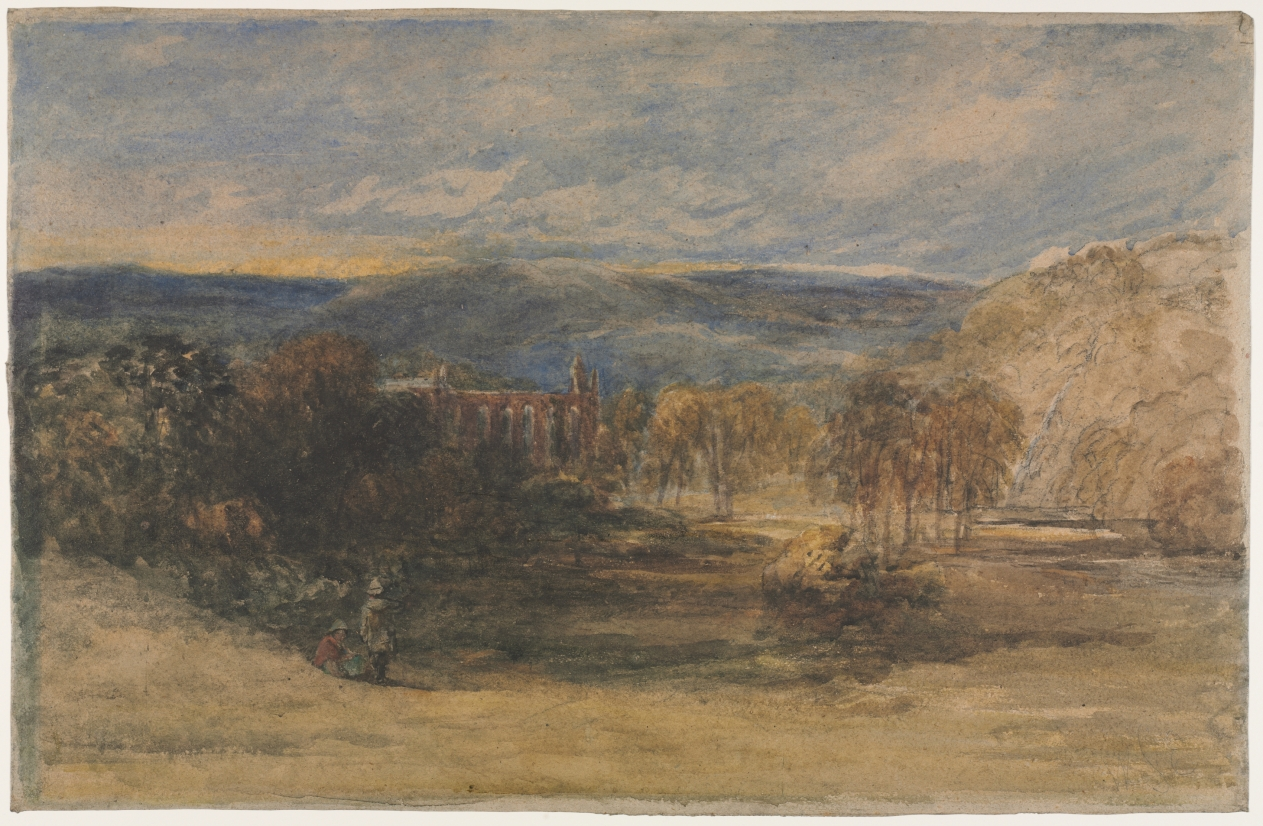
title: Bolton Abbey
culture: England, 19th century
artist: David Cox (British, 1783–1859)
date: c. late 1840s-1857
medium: watercolor with black chalk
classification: Drawing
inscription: inscribed, at lower right, in graphite: WSE; in white chalk on wood backing: June 8-03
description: This moody, broadly painted watercolor on rough, brown paper is emblematic of David Cox’s late style. Velvety grays and greens throughout the composition shift almost imperceptibly and streaks of blue wash, describing the distant hills and sky, are pierced by a sliver of brilliant yellow at the horizon. The ruined 12th-century priory is relegated to the background, nearly lost in the twilight.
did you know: The neighborhood where Bolton Abbey was found was one of David Cox's favorite places to paint and the church appeared as a subject throughout his works from about 1828 through 1857.